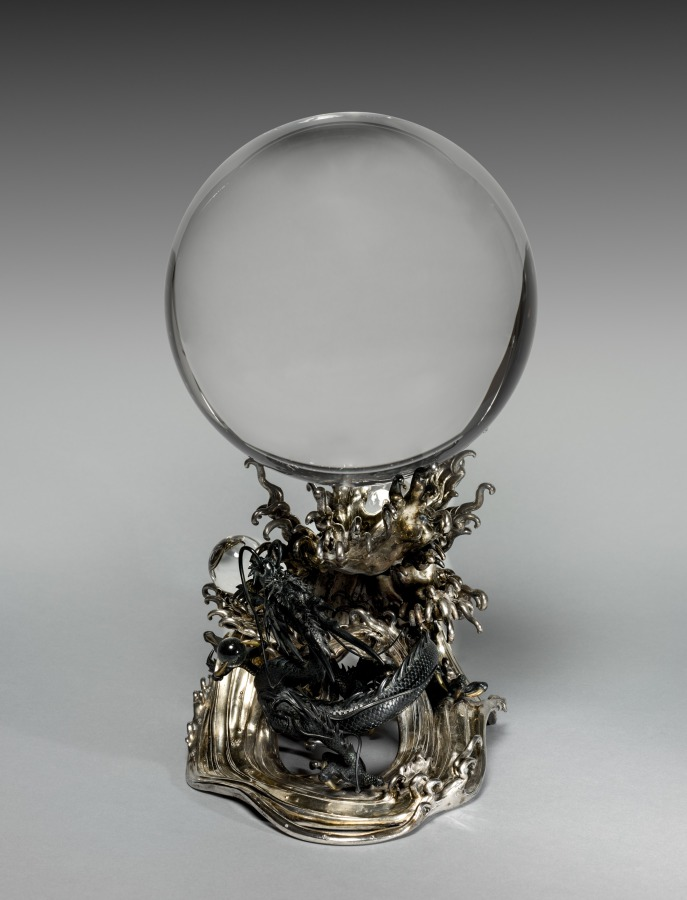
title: Tide-Changing Jewel with Dragon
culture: Japan, Meiji period (1868–1912)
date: early 1900s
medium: silver, shakudō (copper and gold alloy), and crystal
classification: Metalwork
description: An early Japanese legend describes a god of the sea who possesses two jewels responsible for controlling the ebb and flow of the tides. In other legends, the jewels belong to the Dragon King who rules from a palace beyond or beneath the sea. Tales received from China feature dragons that can generate rain by using pearls. This okimono (a small sculptural object without a function) mines imagery associated with these tales while aiming to appeal to the interest in gems and minerals embraced by some Americans and Europeans of the late 1800s and early 1900s.